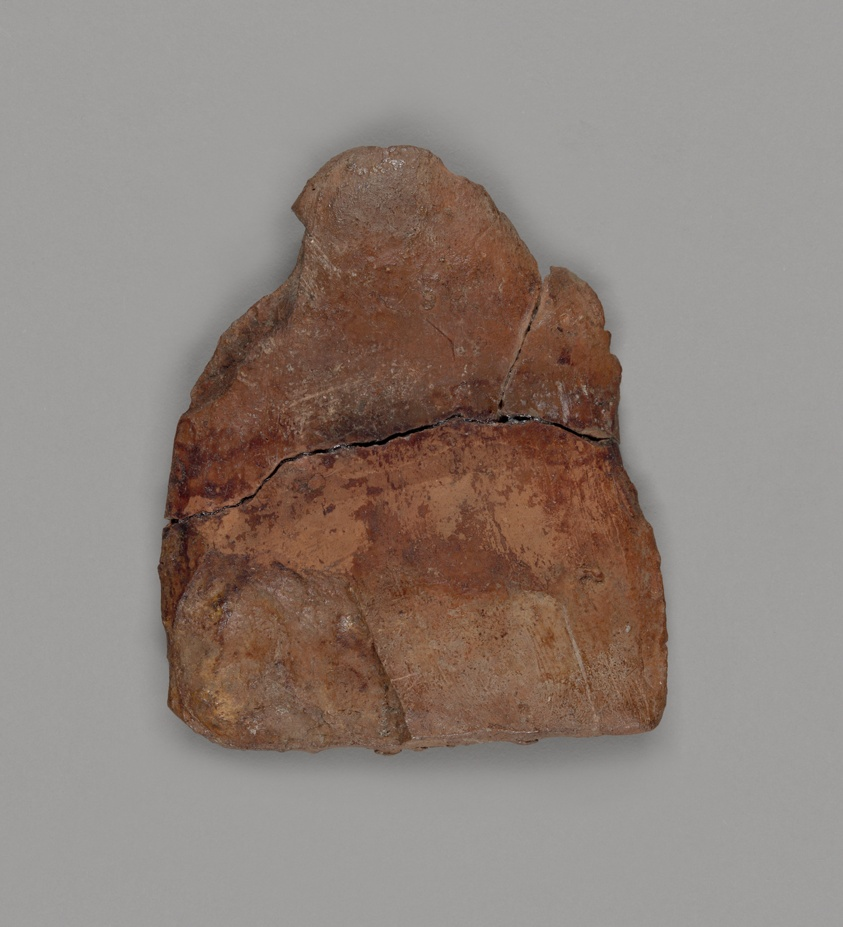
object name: Religious/Ritual Object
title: Votive Tablet of Gautama Buddha with Attendant Buddhas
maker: Thailand; Lamphun Province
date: 12th/13th century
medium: Terra-cotta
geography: Northern region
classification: bone; asian art; shrine; ritual objects